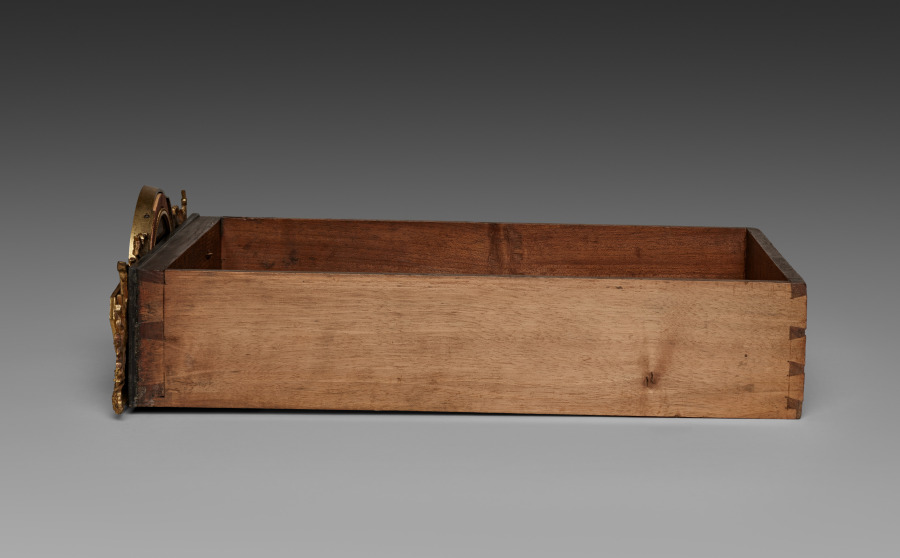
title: Center Drawer for Cabinet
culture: France, late 17th Century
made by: André-Charles Boulle (French, 1642–1732)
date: c. 1690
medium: ebony, marquetry in metal and tortoiseshell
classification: Furniture and woodwork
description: Appointed cabinetmaker to King Louis XIV in 1672, André-Charles Boulle became a master of furniture making in France during the late 1600s until his death in 1732. Known primarily for his use of marquetry, in which metal patterns are inlaid into tortoiseshell then applied within the veneered surface of the furniture, Boulle established a level of quality and craftsmanship few others could achieve. As a result, his work found favor at the royal court and among other aristocrats and diplomats eager to impress the king. The inclusion of a medallion depicting Louis XIV within the bronze decoration of this chest would have identified the owner with the royal court. Often exhibiting stout architectural proportions with elegant groups of inlaid motifs such as the parrot on the central panel of this chest, Boulle’s designs are an example of the intellectual fashion for contrasting ideas, materials, and motifs.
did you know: Originally designed to sit atop an elaborate tall stand, this chest was likely altered in the late 1700s to reduce its scale and height.